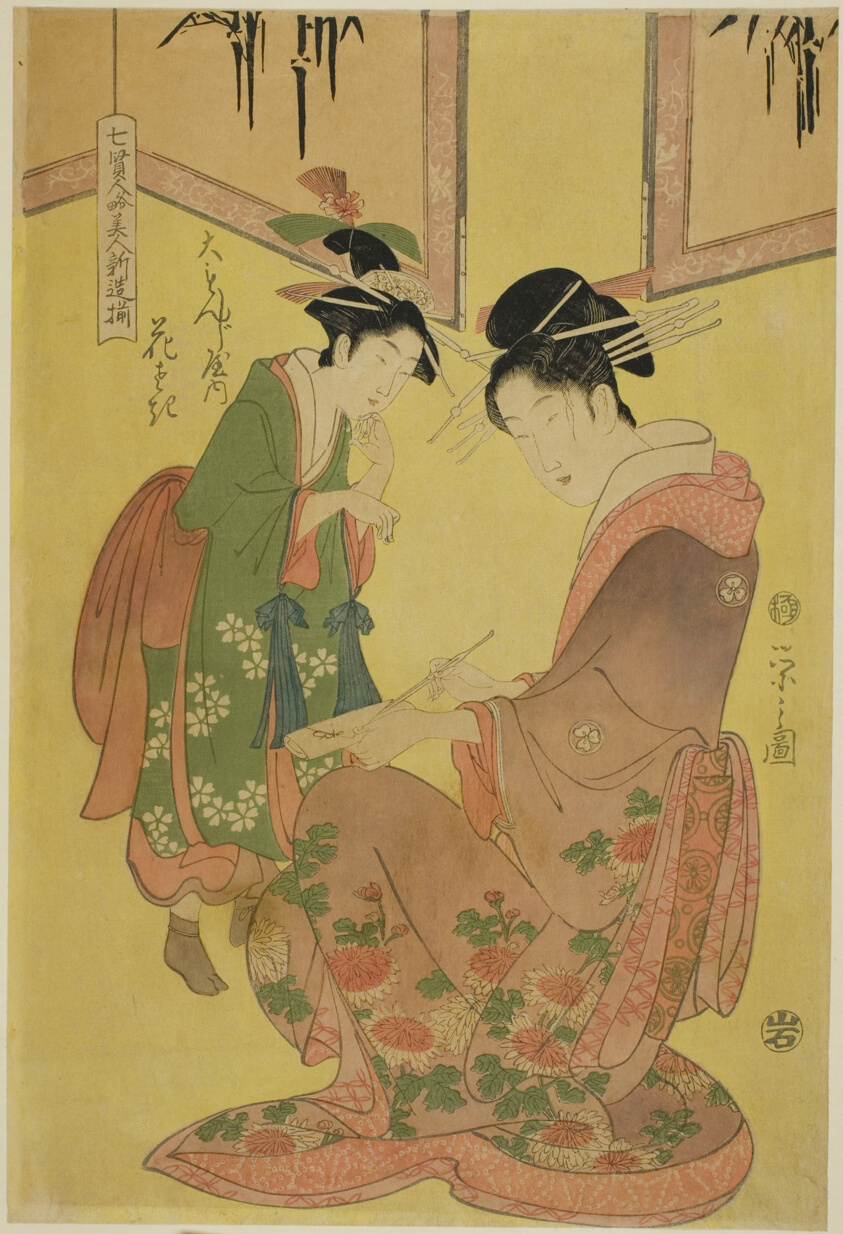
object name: Print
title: Beauties Parodying the Seven Sages - A Selection of Younger Courtesans (Shichi kenjin yatsushi bijin shinzo zoroe): Hanasaki of the Daimonjiya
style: Japanese (culture or style)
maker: Chobunsai Eishi; Japanese, 1756-1829; Publisher: Iwato-Ya; Japanese, Unknown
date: c. 1793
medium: Color woodblock print; oban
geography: Japan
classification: woodblock print; print; asian art